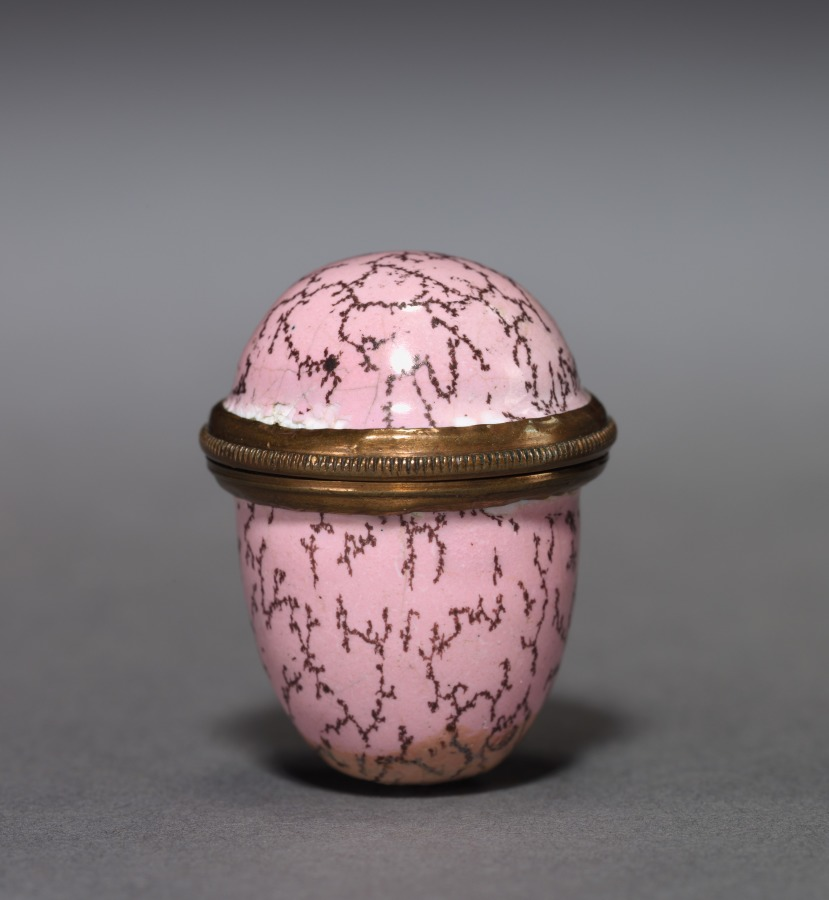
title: Thimble and Container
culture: England, mid-18th century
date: mid-18th century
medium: enamel on metal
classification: Enamel